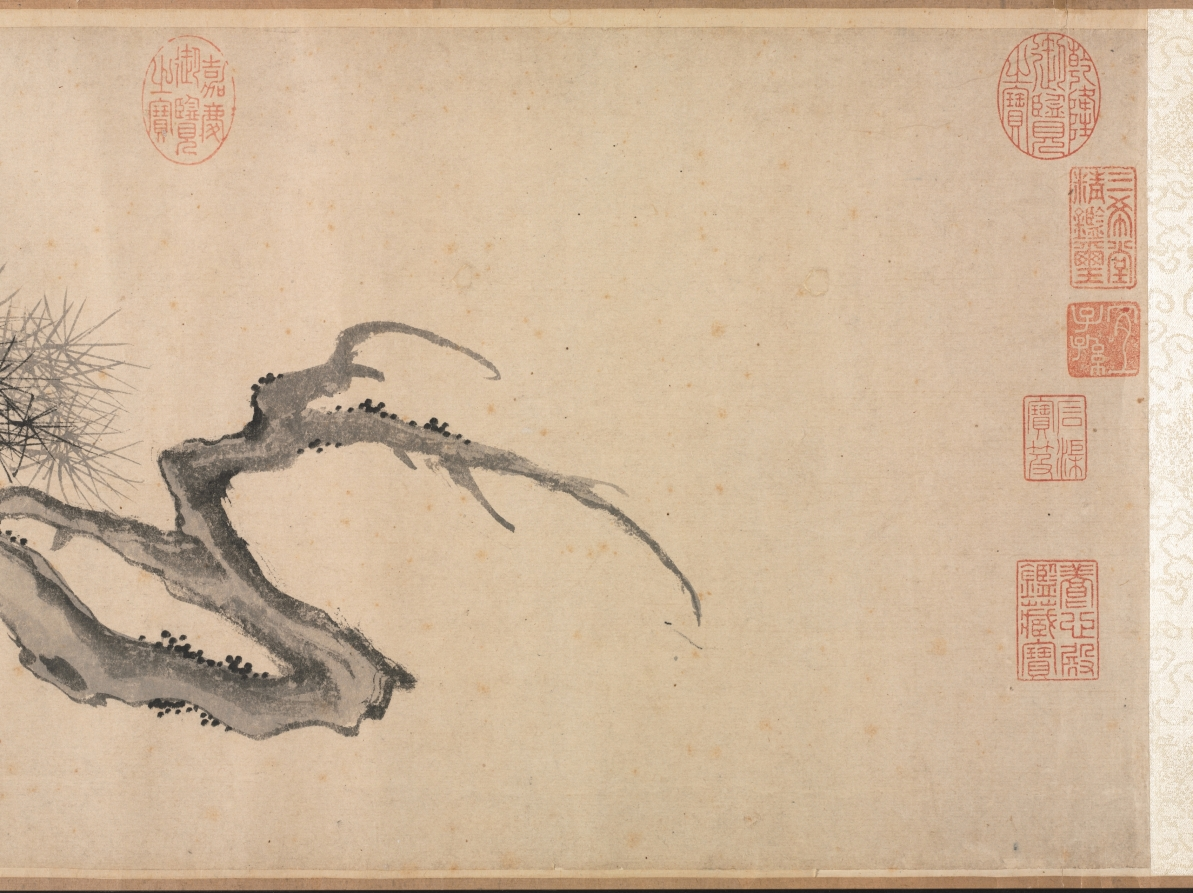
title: Old Pine Tree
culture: China, Ming dynasty (1368–1644)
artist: Wen Zhengming (Chinese, 1470–1559)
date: late 1530s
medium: handscroll; ink on paper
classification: Painting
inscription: 變化勢難縛，虬髯似戟森. 徵明 [印]文徵明印; 衡山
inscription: 2 partial seals of Qian Shisheng 錢士昇 (1575–1652)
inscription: 8 imperial seals: 6 of the Qianlong emperor (r. 1736–95); 1 of the Jiaqing emperor (r. 1796–1821); 1 of the Xuantong emperor (r. 1909–11).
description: Here the natural appearance of a gnarled and vine-entangled pine has been transformed into a rhythmic abstraction of brushstrokes and ink tonalities, with unifying opposites—opening and closing, rising and falling—that provide the design across the horizontal scroll. The artist's inscription reads: "The force of change beyond restraint; / The dragon's whiskers are likened to a forest of spears."